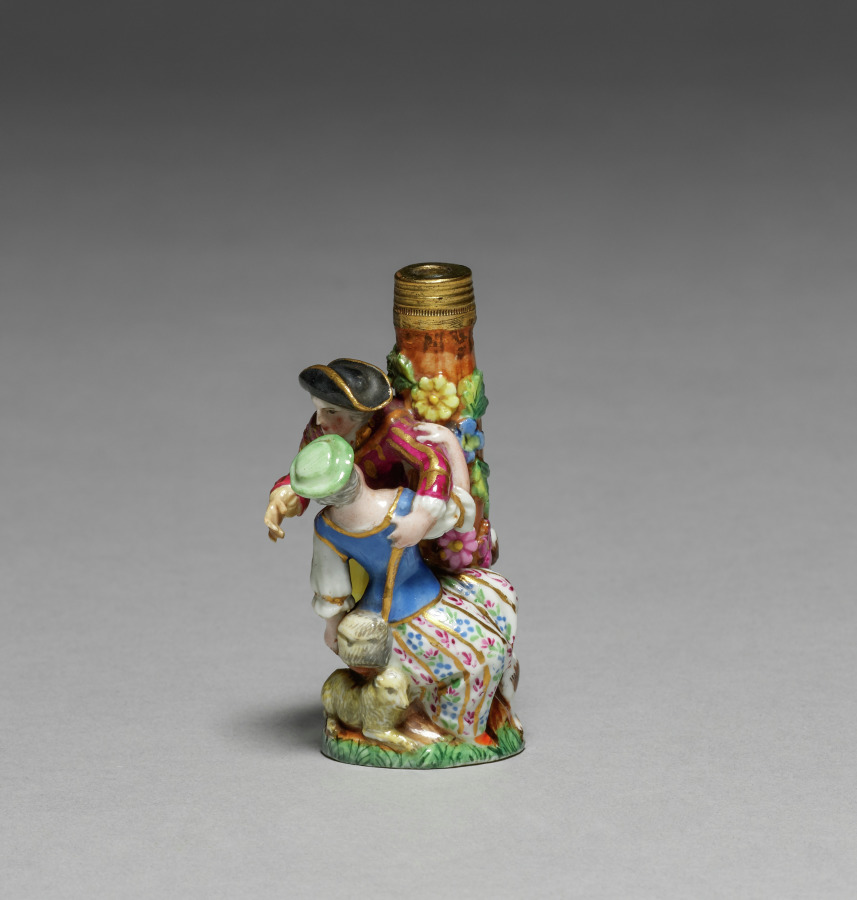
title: Scent Bottle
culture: Germany, Meissen, 19th century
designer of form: manner of Meissen Porcelain Factory (German, est. c. 1710)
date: 1800s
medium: porcelain with gilt metal mounts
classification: Miscellaneous